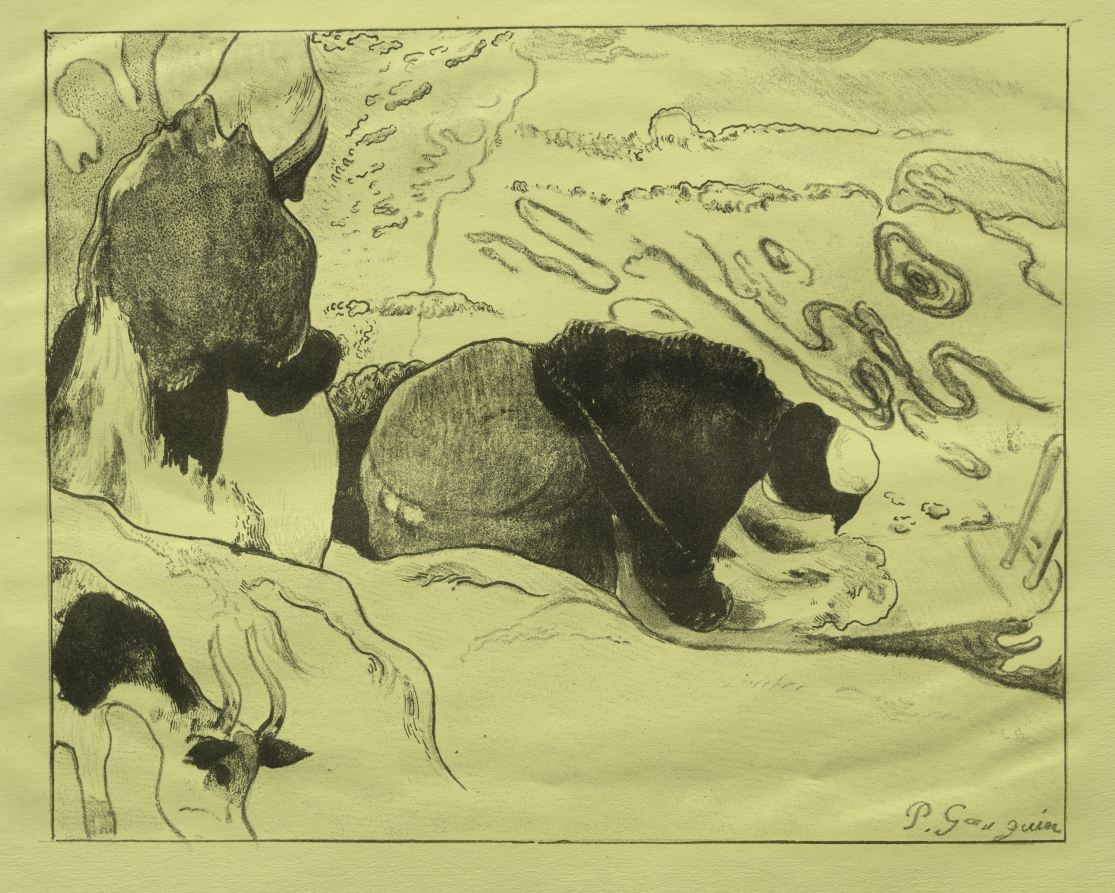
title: Volpini Suite: Laundresses (Les Laveuses)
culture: France, 19th century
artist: Paul Gauguin (French, 1848–1903)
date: 1889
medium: zincograph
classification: Print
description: Gauguin discovered an exotic, primitive culture in Brittany, a rugged region on the Atlantic coast in northwestern France. He then sought to translate into expressive forms the picturesque costumes, customs, and special spirituality of the peasants. The unusual point of view, the stylization of the frothing water, and the cropped cow at the lower left all betray the influence of Japanese woodblock prints, which became popular in France from the early 1860s. The twelve lithographs in this set, printed from zinc plates rather than stones, were Gauguin's first attempts at printmaking. To heighten the decorative effect, the lithographs were printed onto large sheets of bright yellow paper.